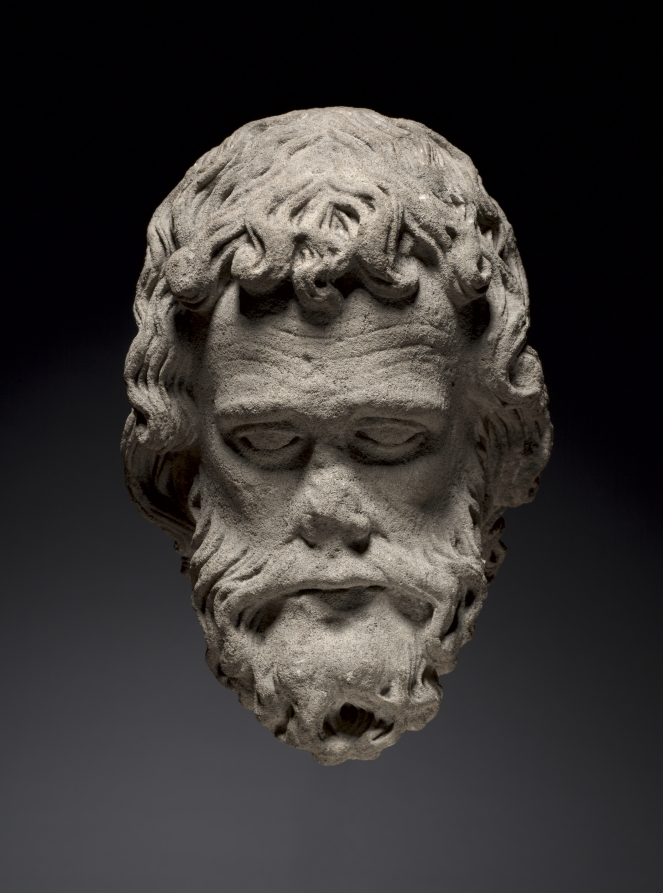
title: Head of an Apostle from the South Portal of the Cathedral of Thérouanne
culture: Northern France (Pas-de-Calais), Thérouanne, 13th century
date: c. 1235–1240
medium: oolitic limestone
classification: Sculpture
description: These monumental stone heads are among the substantial known remains of the sculptural program of Thérouanne’s cathedral, which was razed by Emperor Charles V of Spain in June 1553. These heads were found in a wall of rue Ste. Croix in the town of Saint Omer (a short distance to the north) in January 1923. This group of sculptures from the gable of the south portal of Thérouanne, which includes a stylistically related Christ as Judge, is recorded to have been moved to the Cathedral of Saint Omer in 1554. With their deeply carved wavy hair, curly beards, wrinkled foreheads, and ponderous facial features, these imposing heads—even in their now fragmentary and weathered state—attest to the powerful monumentality of the stone sculpture covering French church facades of the Gothic period.